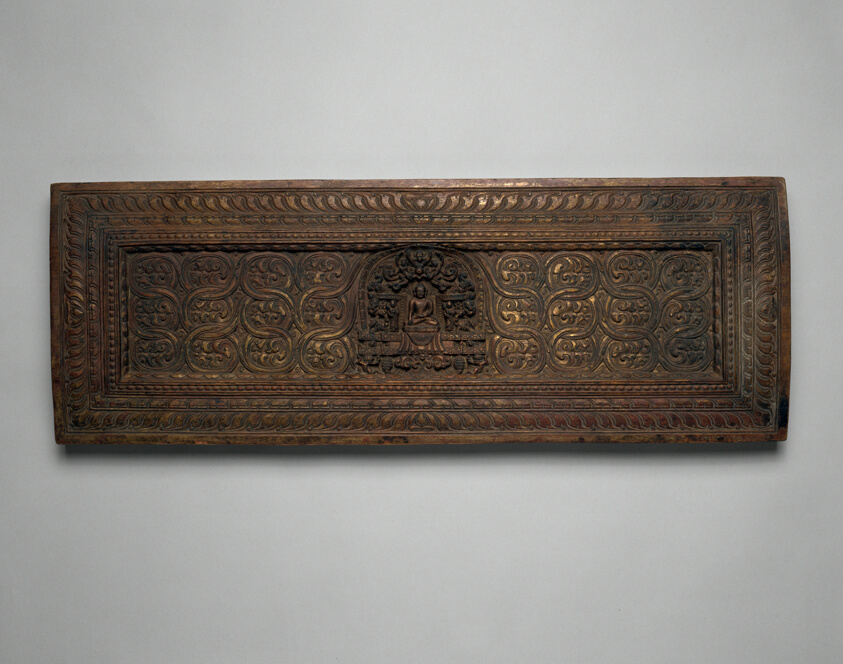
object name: Book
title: Manuscript Cover with Enshrined Sakyamuni Buddha with Hand in Earth Touching (Bhumisparsha) Mudra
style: Himalayan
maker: Tibet; Central Tibet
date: 15th century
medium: Wood with traces of gilding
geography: Tibet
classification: wood; asian art; book